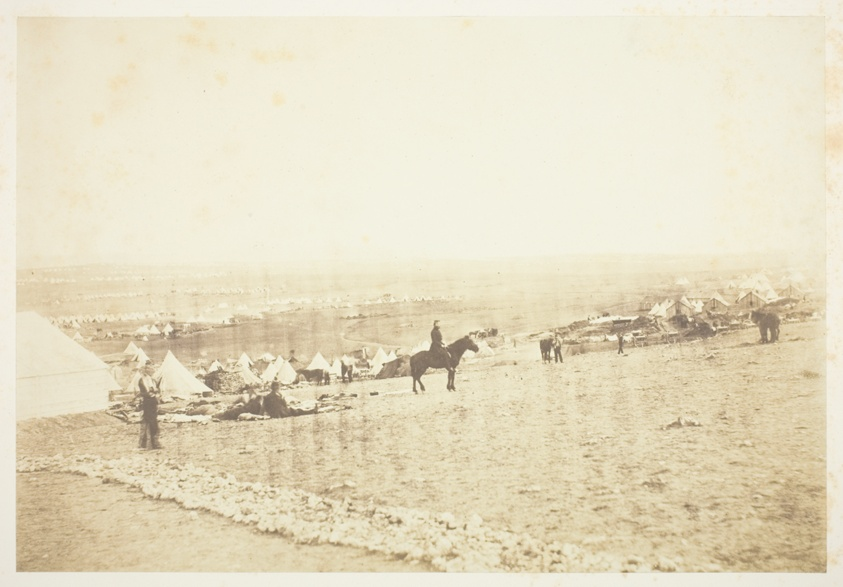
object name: Photograph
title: Plateau of Sebastopol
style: 19th century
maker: Roger Fenton (English, 1819–1869)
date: 1855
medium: Salted paper print, from the album "Photographic Pictures of the Seat of War in the Crimea" (1856)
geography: England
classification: salted paper print; photographic process; photography; photograph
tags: Collected by Hugh Edwards